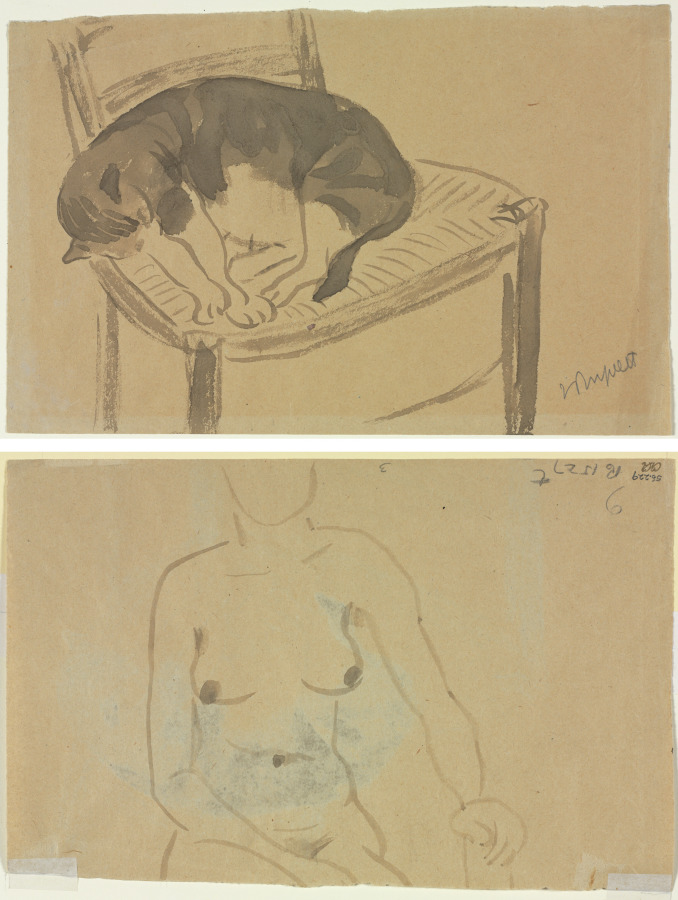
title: Sleeping Cat (recto) Torso of a Nude Woman (verso)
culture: France, 20th century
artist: Jane Poupelet (French, 1878–1932)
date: first third 1900s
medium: brush and gray wash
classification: Drawing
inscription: signed, lower right, in graphite: j Poupelet